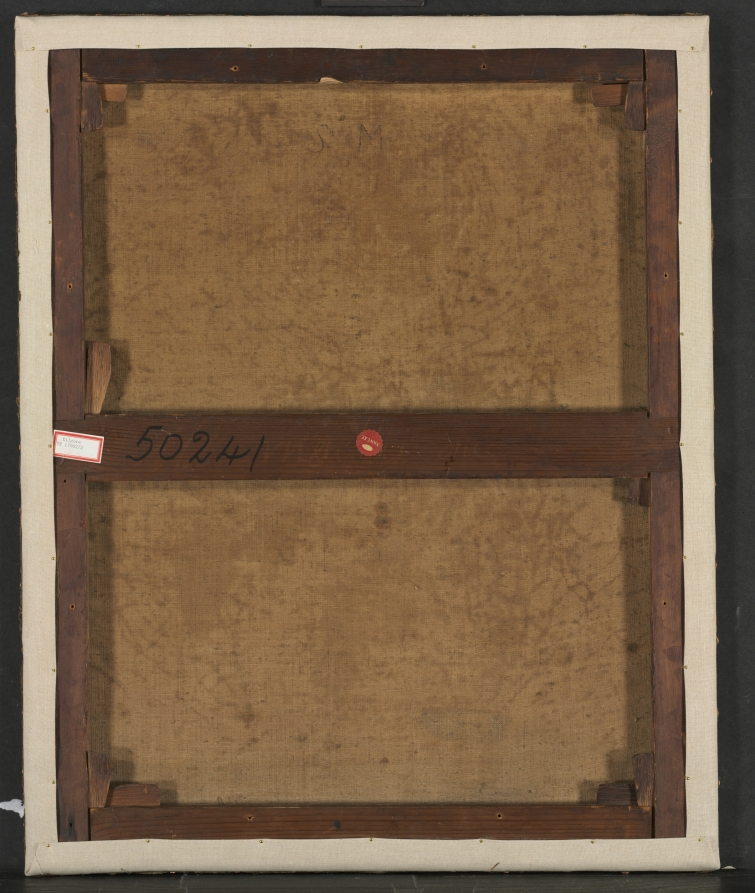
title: Sweet Melancholy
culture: France, 18th century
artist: Joseph-Marie Vien (French, 1716–1809)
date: 1756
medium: oil on canvas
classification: Painting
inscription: Signed lower right: "jos. m. vien / 1756"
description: The chair, brazier, table, and the setting all show Vien's interest in bringing archaeological accuracy to a new level of precision. Yet his delicate handling and graceful palette derive squarely from 18th-century French painting. The gesture of the melancholic figure, with her head on her hand, has roots going back to the Renaissance. Nonetheless, the painting has a wistful rather than tragic tone. Indeed, images of women in interiors, contemplating a letter with longing or sadness, derive from earlier Dutch paintings of daily life, here transformed into an ancient context.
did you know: Look closely—three strands of pearls appear in this painting.